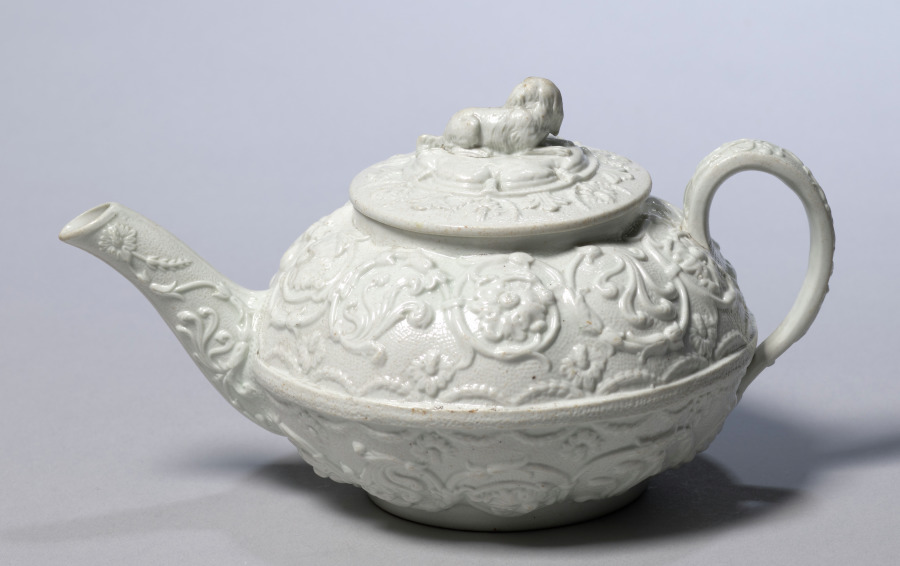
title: Teapot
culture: England, Staffordshire, 19th century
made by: Wedgwood Factory (British)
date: c. 1830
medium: stoneware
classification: Ceramic